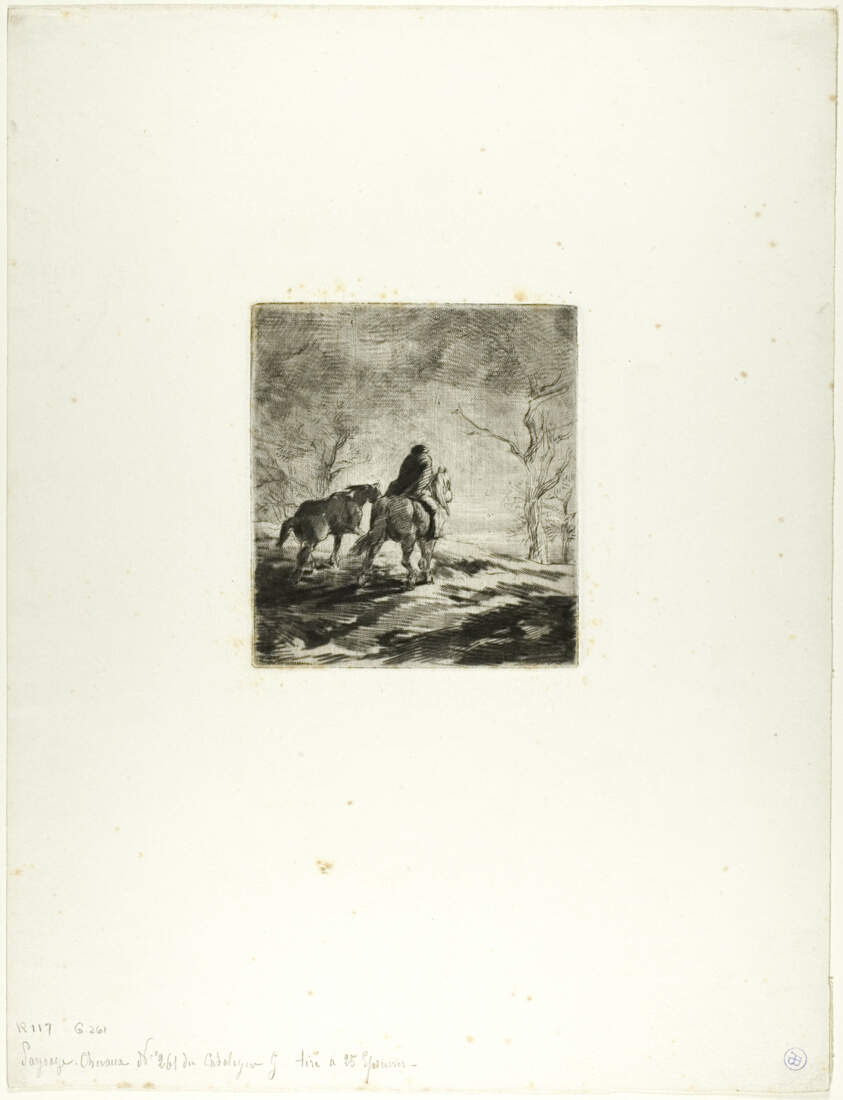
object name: Print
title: Traveler on Horseback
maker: Charles Émile Jacque (French, 1813-1894)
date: 1848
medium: Drypoint and roulette on ivory wove paper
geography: France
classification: drypoint; print; prints and drawing